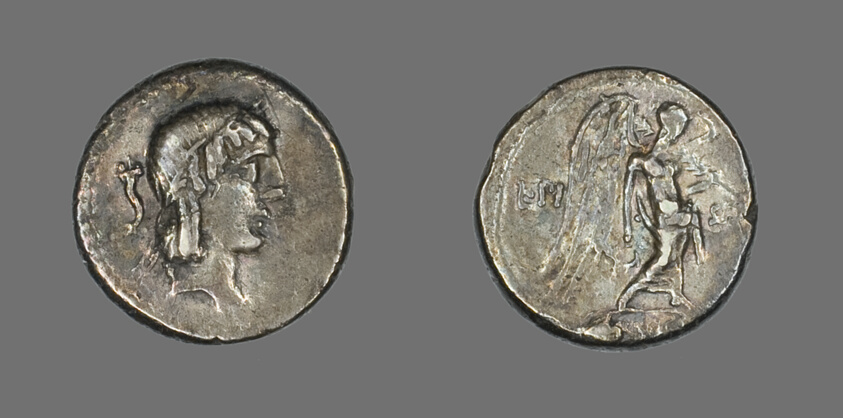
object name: Coin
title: Quinarius (Coin) Depicting the God Apollo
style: roman (ancient, style or period), ancient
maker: Roman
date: about 90 BCE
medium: Silver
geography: Roman Empire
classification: coin; ancient art